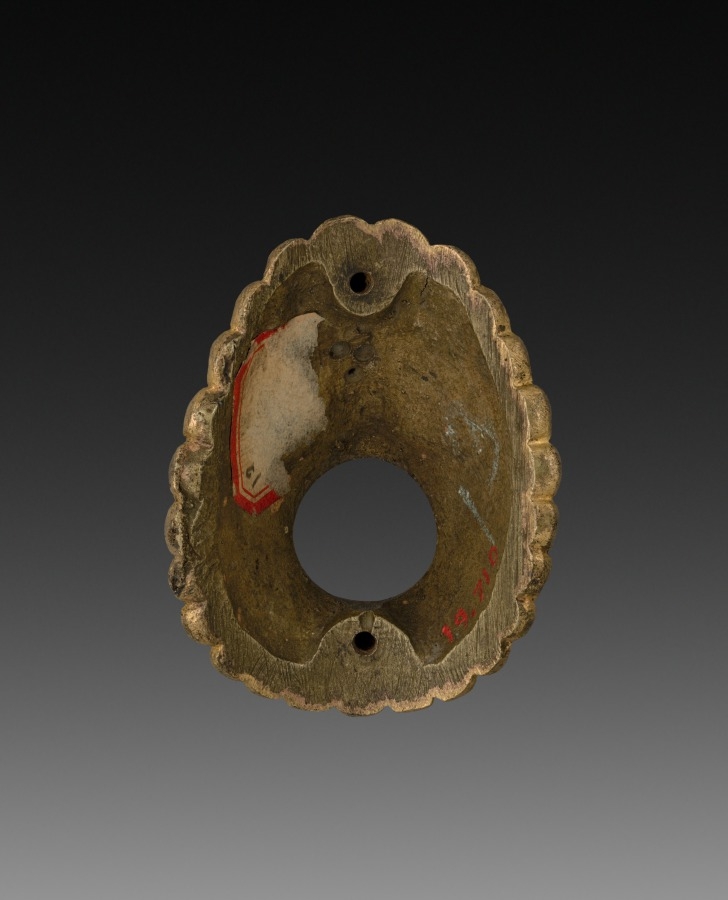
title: Ornamental Detail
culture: France, 19th century, Empire Style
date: c. 1800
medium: gilt bronze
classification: Metalwork